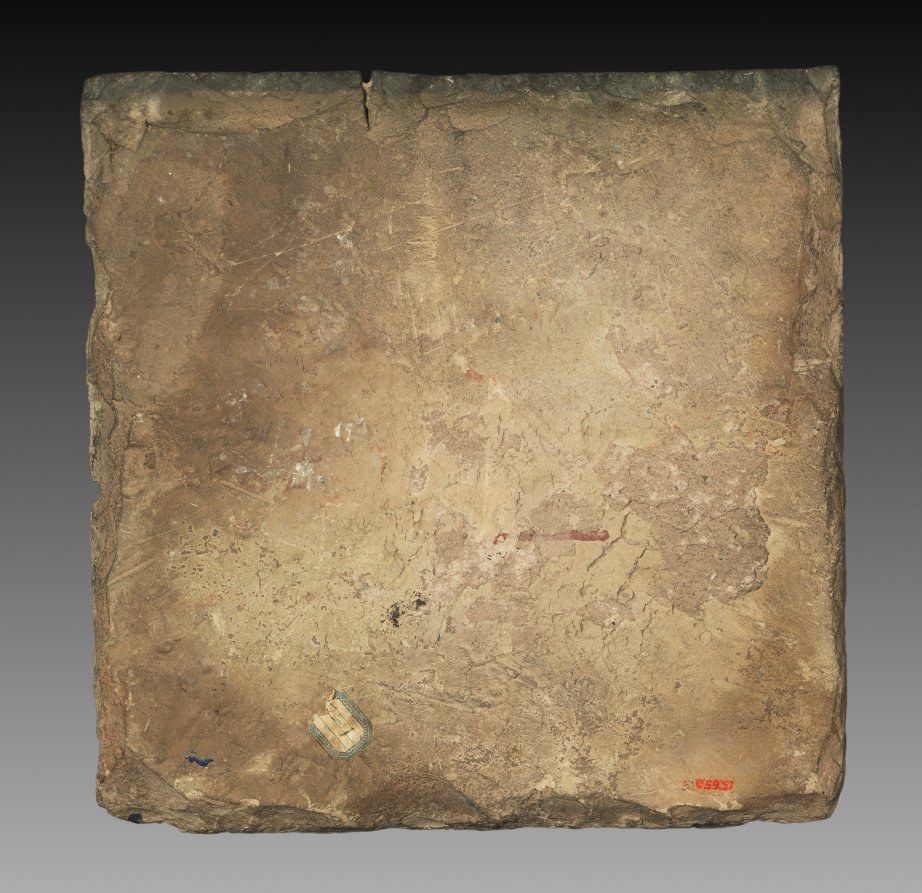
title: Wall Tile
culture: Iran, Safavid period (1501–1722)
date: 1600s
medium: faience, cuerda seca technique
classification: Ceramic